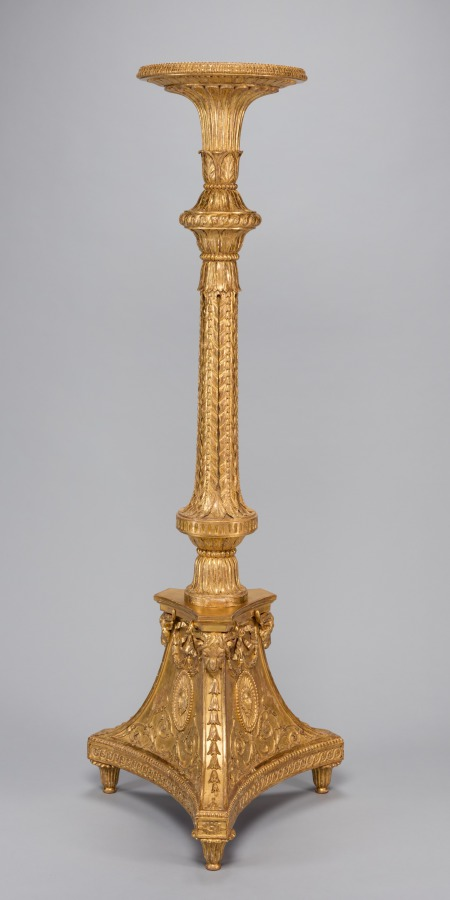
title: Candle Stand (torchère) (1 of 2)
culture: England, 18th century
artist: Thomas Chippendale (British, 1718–1779)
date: c. 1773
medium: Gilt-wood, gesso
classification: Furniture and woodwork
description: This gilded candle stand was made by Thomas Chippendale, the most renowned cabinetmaker in eighteenth-century London, for the grand drawing room of Brocket Hall, a large country house in Hertfordshire, England. With finely carved acanthus leaves, swags, fluting, and oval masks depicting the Roman goddess Diana, this candle stand exhibits Chippendale’s masterful understanding of neoclassical proportion, scale, and ornament. His landmark book of furniture designs, The Gentleman and Cabinet-Maker’s Director (first published in 1754), was highly admired as a source of inspiration by cabinetmakers and architects around England as well as in Europe and America.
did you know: Candle stands usually held silver or crystal candelabra that were lit for evening entertainment.